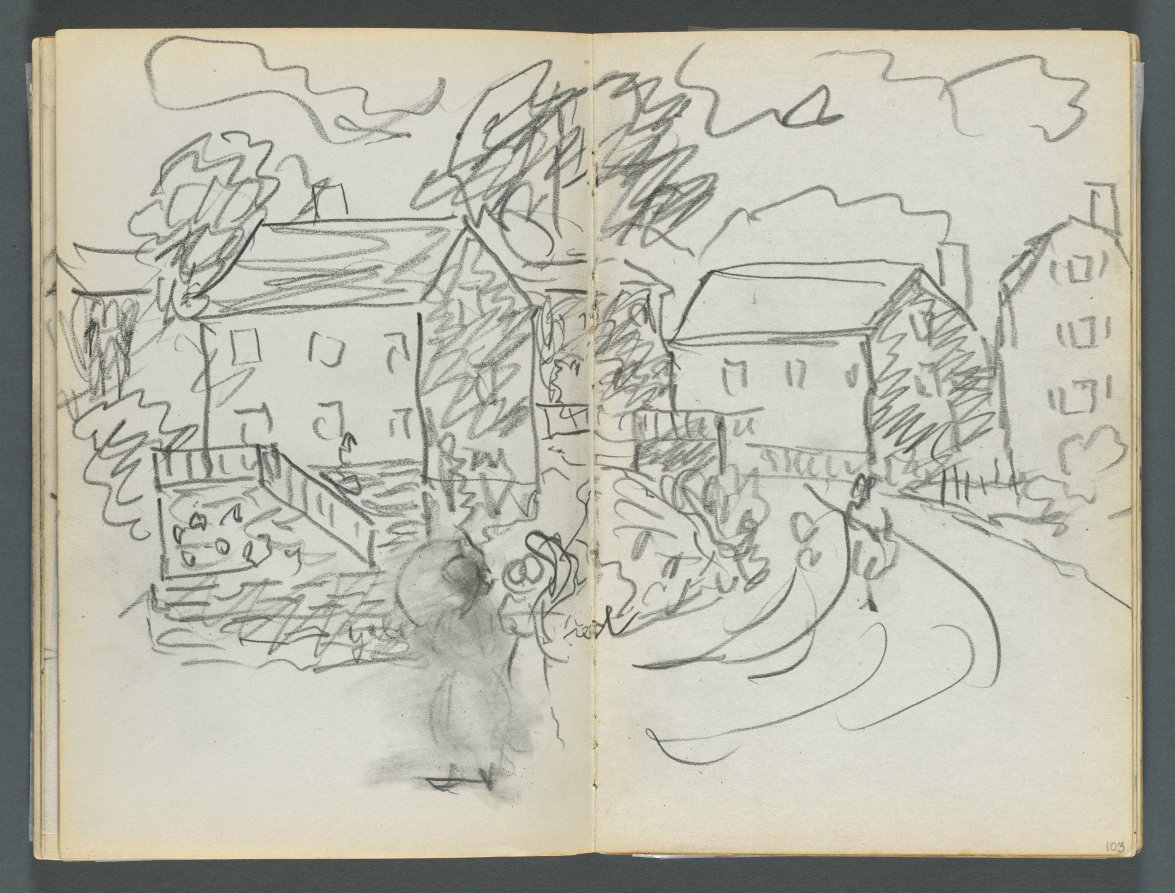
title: Sketchbook, The Dells, N° 127, page 102 & 103: Landscape with Houses and Road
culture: America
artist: Maurice Prendergast (American, born Newfoundland [now Canada], 1858–1924)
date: c. 1919–1921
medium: graphite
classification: Bound Volume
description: This sketchbook contains 59 pages of graphite drawings and 16 watercolors made at various locations on Cape Ann, Massachusetts.